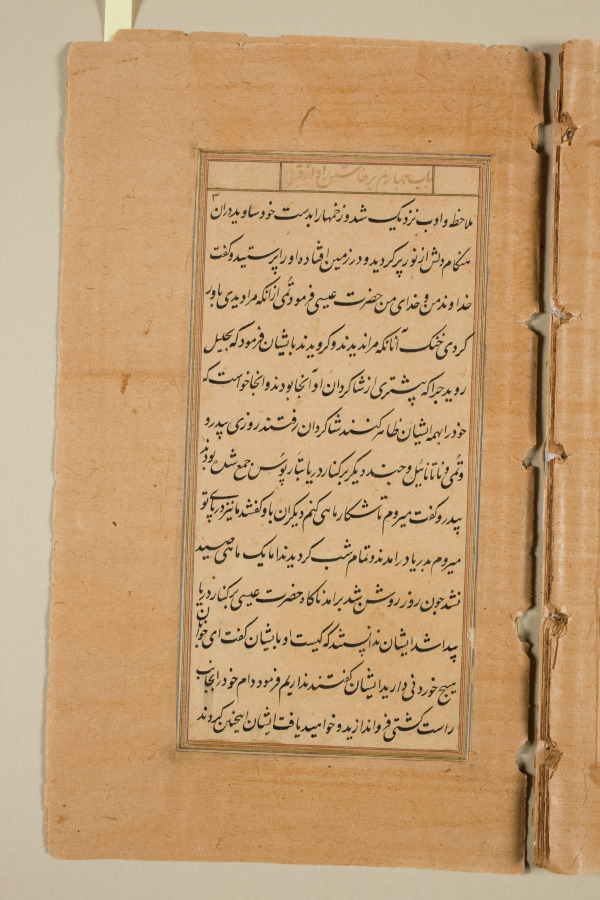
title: Text page from a Mirror of Holiness (Mir’at al-quds) of Father Jerome Xavier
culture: Mughal India, Allahabad, made for Prince Salim (1569–1627)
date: 1602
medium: Ink and gold on paper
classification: Manuscript